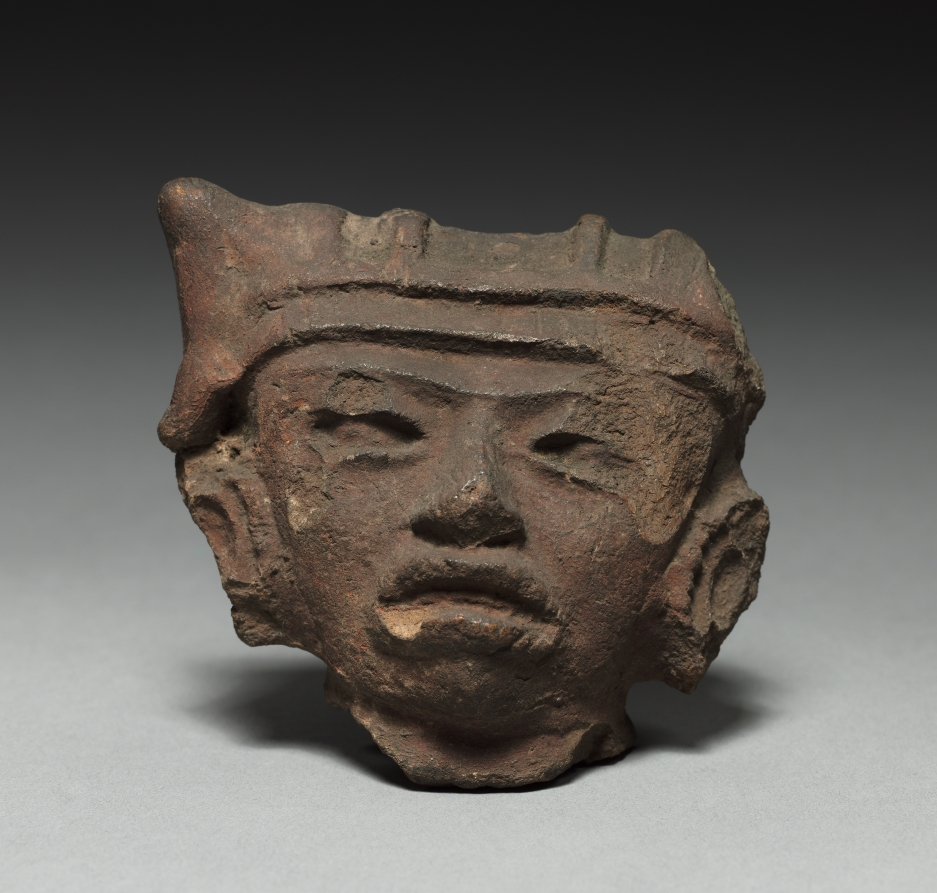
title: Head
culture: Mexico, 600-1000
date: 600–1000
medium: terracotta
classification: Ceramic